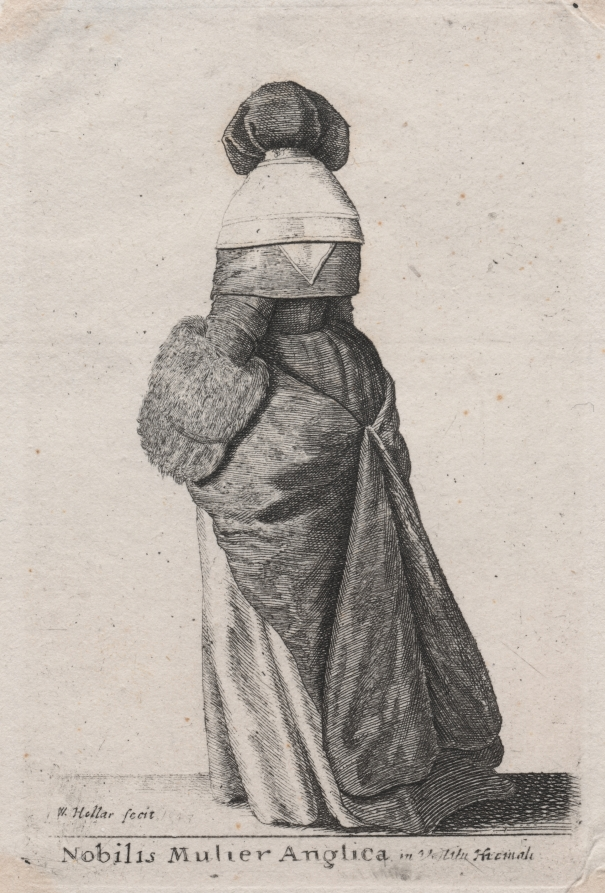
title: Nobilis Mulier Anglica in Vestitu Hiemali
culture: Bohemia, 17th century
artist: Wenceslaus Hollar (Bohemian, 1607–1677)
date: 1643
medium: etching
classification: Print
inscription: inscribed, lower left, in plate: W. Hollar fecit 1643; inscribed, lower center, in plate: Nobilis Mulier Anglica in Vestitu Hiemali